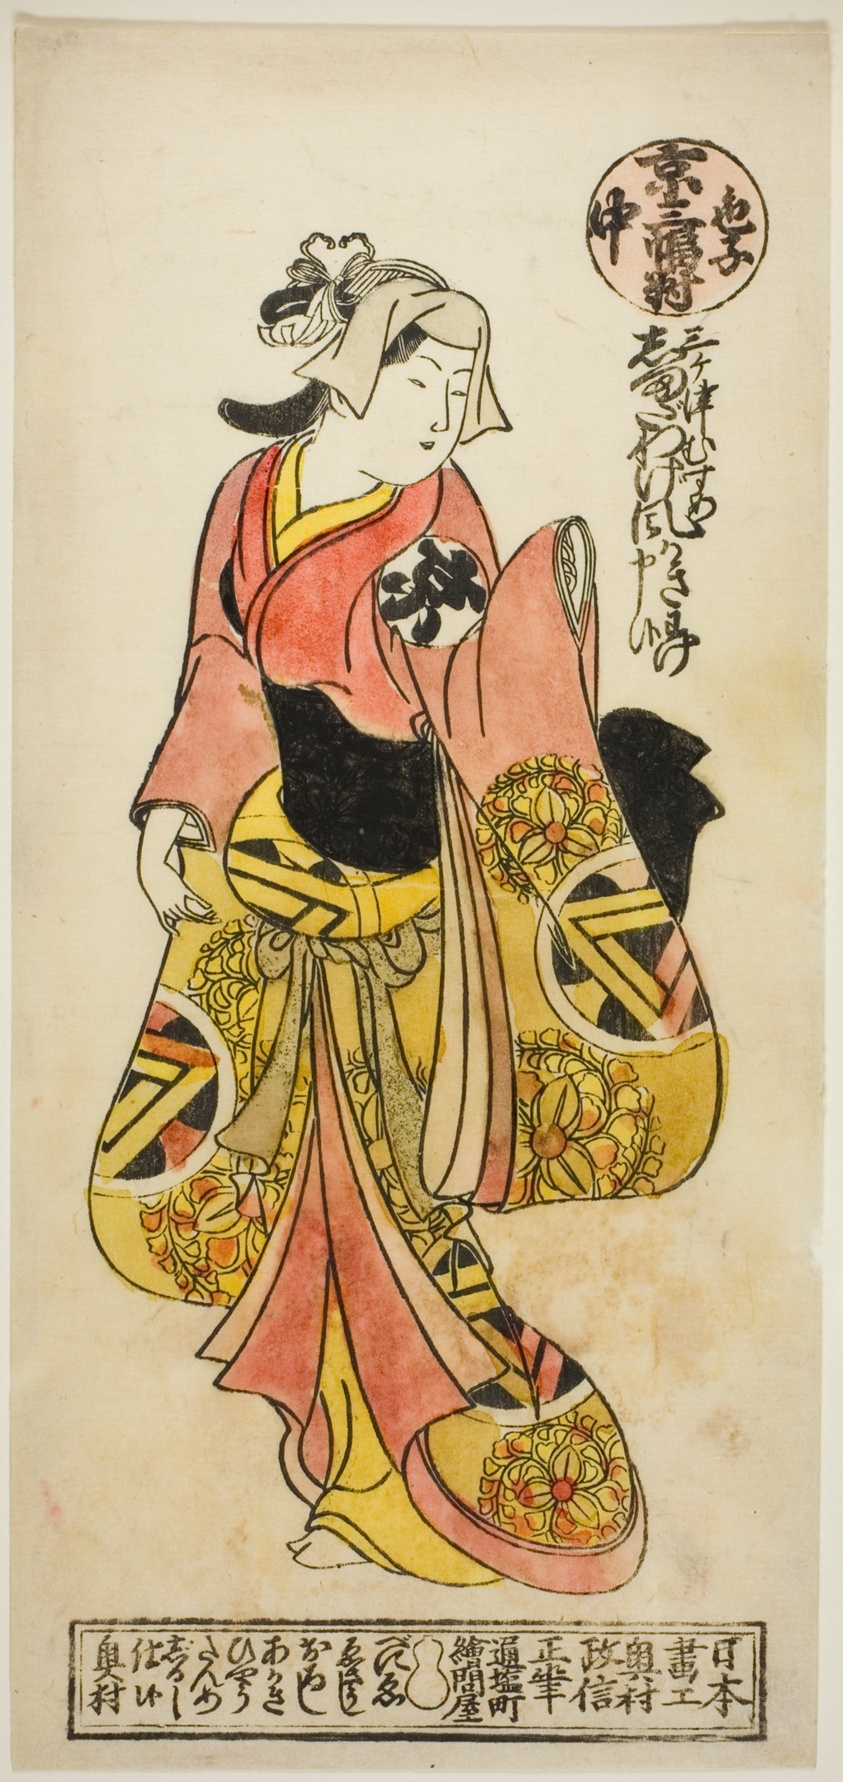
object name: Print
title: Ogino Isaburo, from "A Triptych of Young Kabuki Actors: Kyoto, Center (Iroko sanpukutsui: Kyo, naka)"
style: Japanese (culture or style)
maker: Okumura Masanobu (Japanese, 1686-1764)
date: c. 1723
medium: Hand-colored woodblock print; center sheet of hosoban triptych, urushi-e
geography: Japan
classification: woodblock print; print; asian art